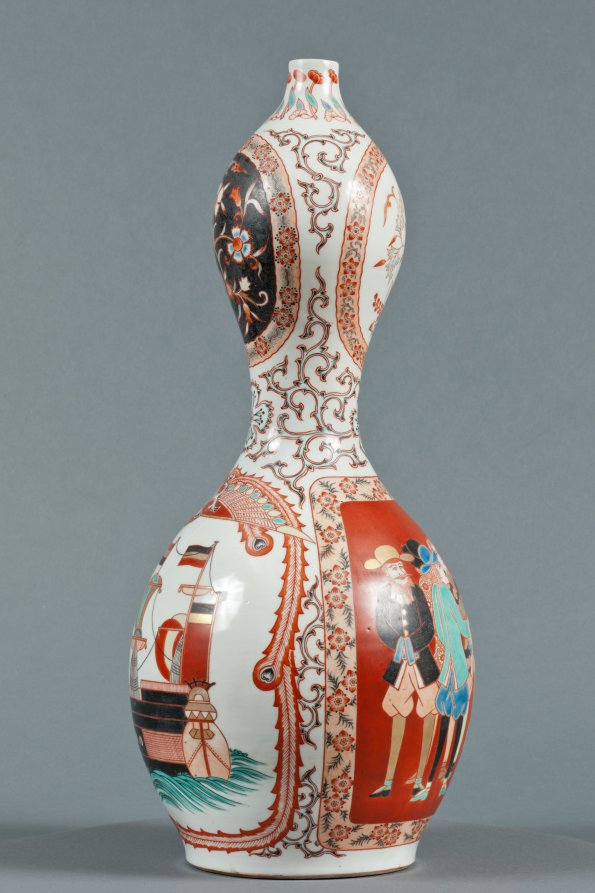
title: Bottle with Western Ships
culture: Japan, Edo period (1615–1868)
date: c. 1800–1868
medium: Porcelain with decoration in colored enamels and underglaze blue, overglaze enamels, and gold (Hizen ware, Arita type)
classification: Ceramic